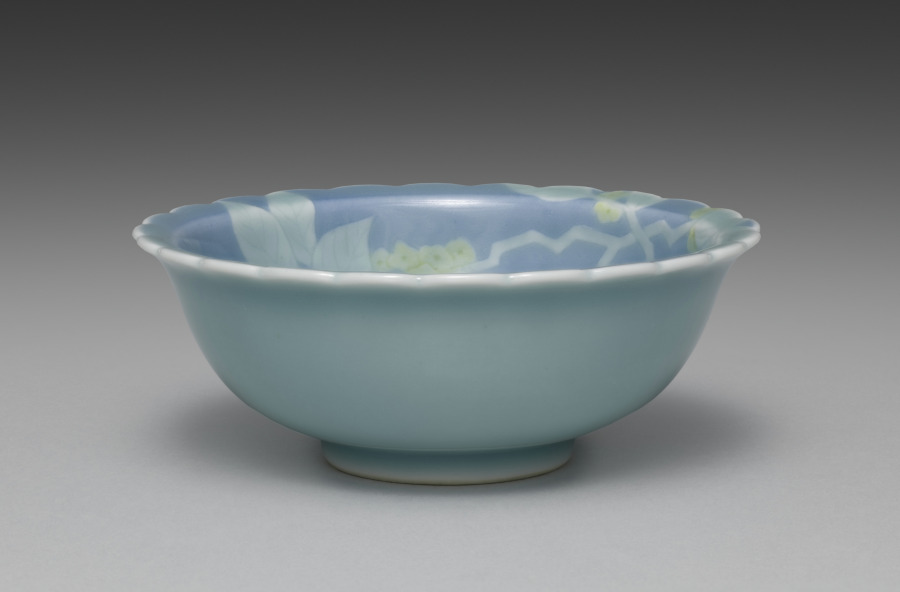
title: Dish from Dishes with Flowers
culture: Japan, Taishō period (1912–26) or Shōwa period (1926–89)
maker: Seifū Yohei IV (Japanese, 1872–1951)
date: 1914–46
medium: One from a set of five dishes; porcelain with underglaze yellow and blue glaze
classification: Ceramic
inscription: 清風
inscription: 清風造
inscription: 成山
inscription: 清風盧人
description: One can imagine a cool summer breeze when looking upon this set of dishes, each shaped with a crenulated mouth and glazed with blue. Around the rim and into the basin, the bowls have low-relief designs of flowers with underglaze yellow petals; their leaves and stems show white through the glaze. On each dish, the design continues over the rim onto one side.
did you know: Seifū Yohei IV’s dishes with flowers feature underglaze yellow.